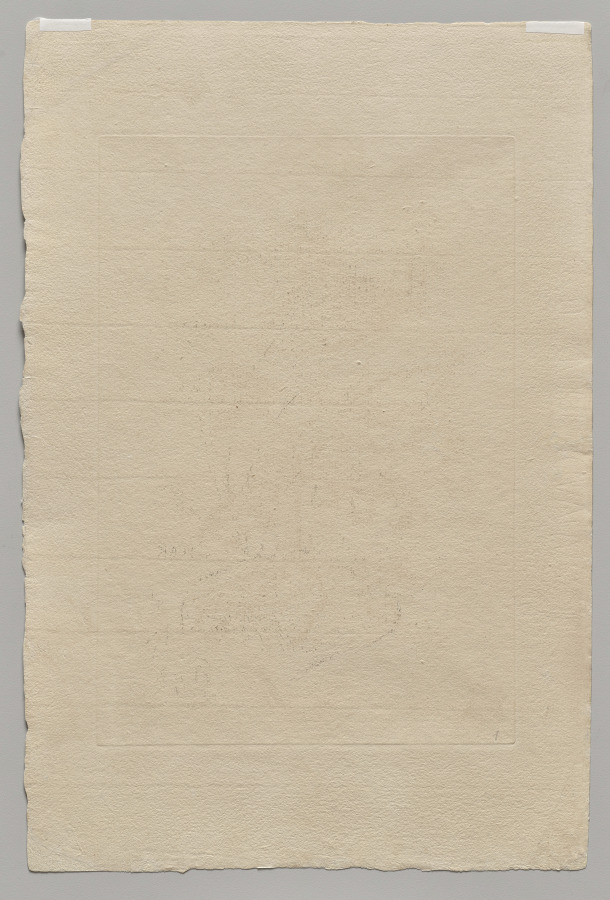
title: Persian Flowers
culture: France, 18th century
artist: Jean Baptiste Pillement (French, 1728–1808)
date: 1755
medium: etching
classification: Print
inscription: in plate: Fleures Persannes. Inventées, Dessinées, et Gravées a leauforte, par Jean Pillement. Se vendent a Paris chez Leviez Marchard d'Estampes Rue St. Andrée des Arts vis-a-vis l'Hotel du Chateau Vieux.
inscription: Watermark along the left edge, partially deciphered by dealer: a Heart followed by SAUVI…FIN…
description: Jean Baptiste Pillement was one of the most influential designers of the Rococo period, known for his varied and prolific chinoiseries (European variants of Chinese and Japanese motifs). His designs were spread throughout Europe primarily via their translation into prints. This print is one of a set of six etched by Pillement himself. Each depicts a so-called “Persian” flower, largely fantasies, presenting strange, alienlike floral forms that could be adapted to various uses from textiles to wall decorations.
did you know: The artist Jean Baptiste Pillement was employed by Marie Antoinette to create decorations for her legendary retreat, the Petit Trianon, at Versailles.